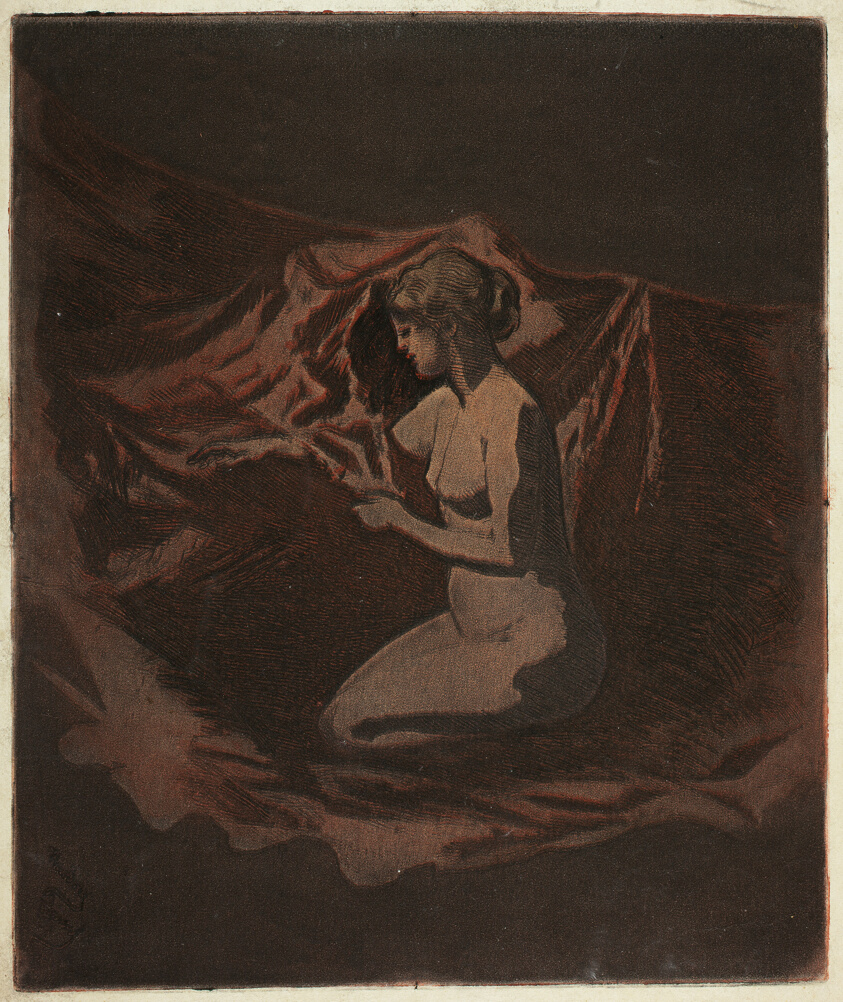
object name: Print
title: Embers Glow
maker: Theodore Roussel (French, worked in England, 1847-1926)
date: 1890–97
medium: Color etching and aquatint on cream (laid) Japanese paper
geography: England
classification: etching; aquatint; paper; print; prints and drawing